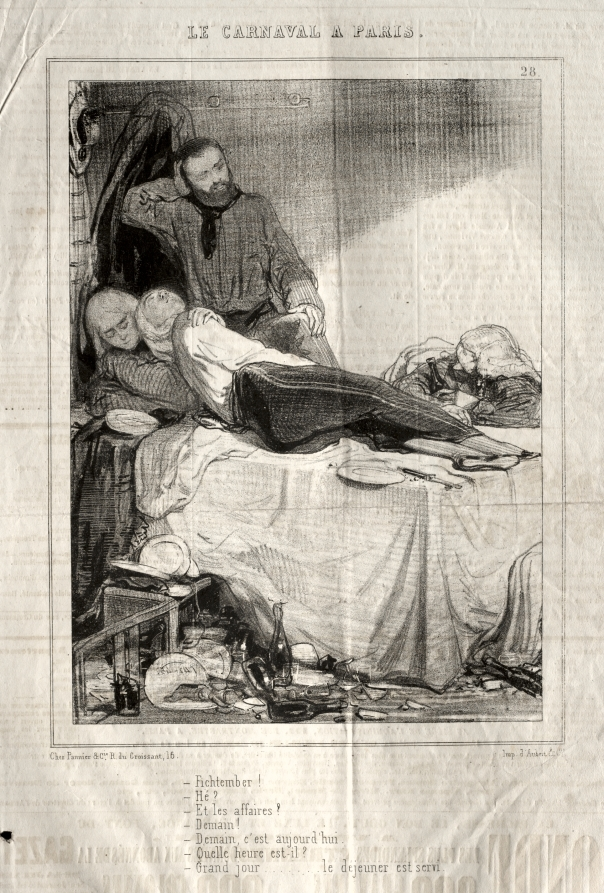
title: Carnaval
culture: France, 19th century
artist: Paul Gavarni (French, 1804–1866)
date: 1841–1843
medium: lithograph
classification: Print